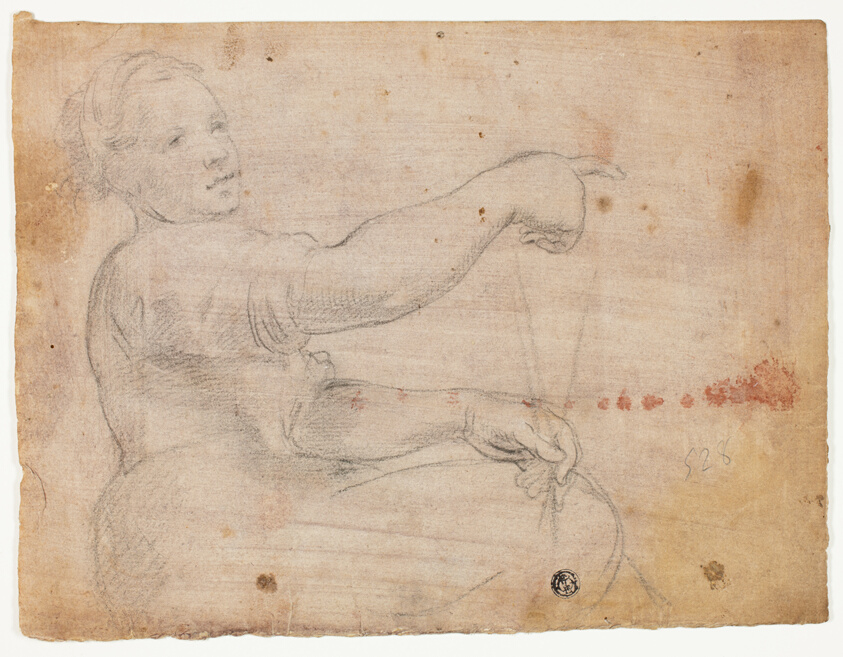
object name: Drawing and Watercolor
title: Seated Girl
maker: Probably Domenico Fiasella (Italian, 1589-1669); or possibly Lazzaro Tavarone (Italian, 1556-1641); or possibly Lorenzo Lippi (Italian, 1606-1665)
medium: Black chalk on pink tinted laid paper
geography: Italy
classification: graphite; drawings (visual works); prints and drawing